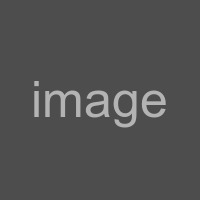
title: Dead Leopard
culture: India, 19th century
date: c. 1880s–90s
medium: albumen print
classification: Photograph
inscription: No visible inscriptions on verso of mount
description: Elaborate big game hunts were a prestigious pastime for the Indians and colonials under the British Raj. This trophy has been laid out for the camera so that its sharp teeth and long tail are visible.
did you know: While the Indian leopard is now a vulnerable species, 19th-century hunters would not have worried about sustaining its population.